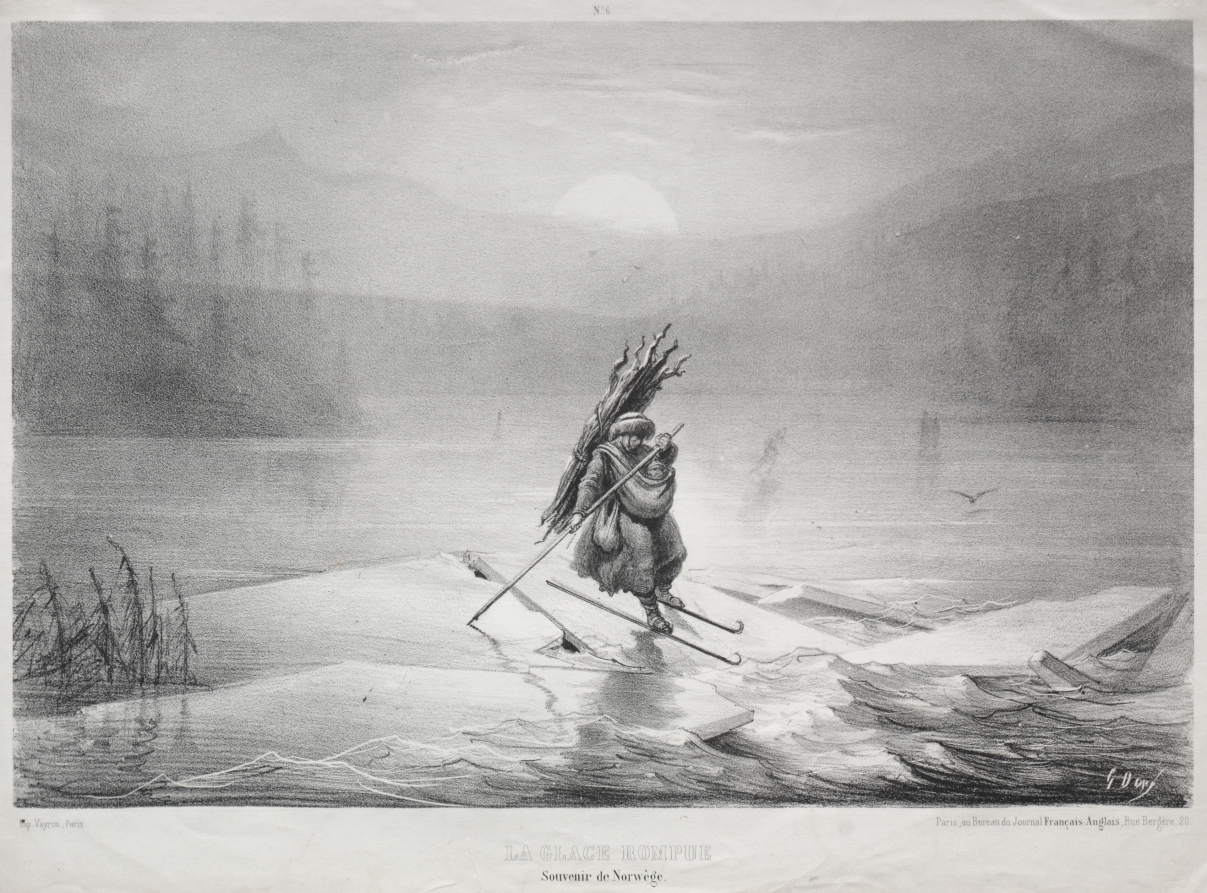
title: The Breaking Ice, Souvenir of Norway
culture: France, 19th century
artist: Gustave Doré (French, 1832–1883)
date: late 1800s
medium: lithograph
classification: Print